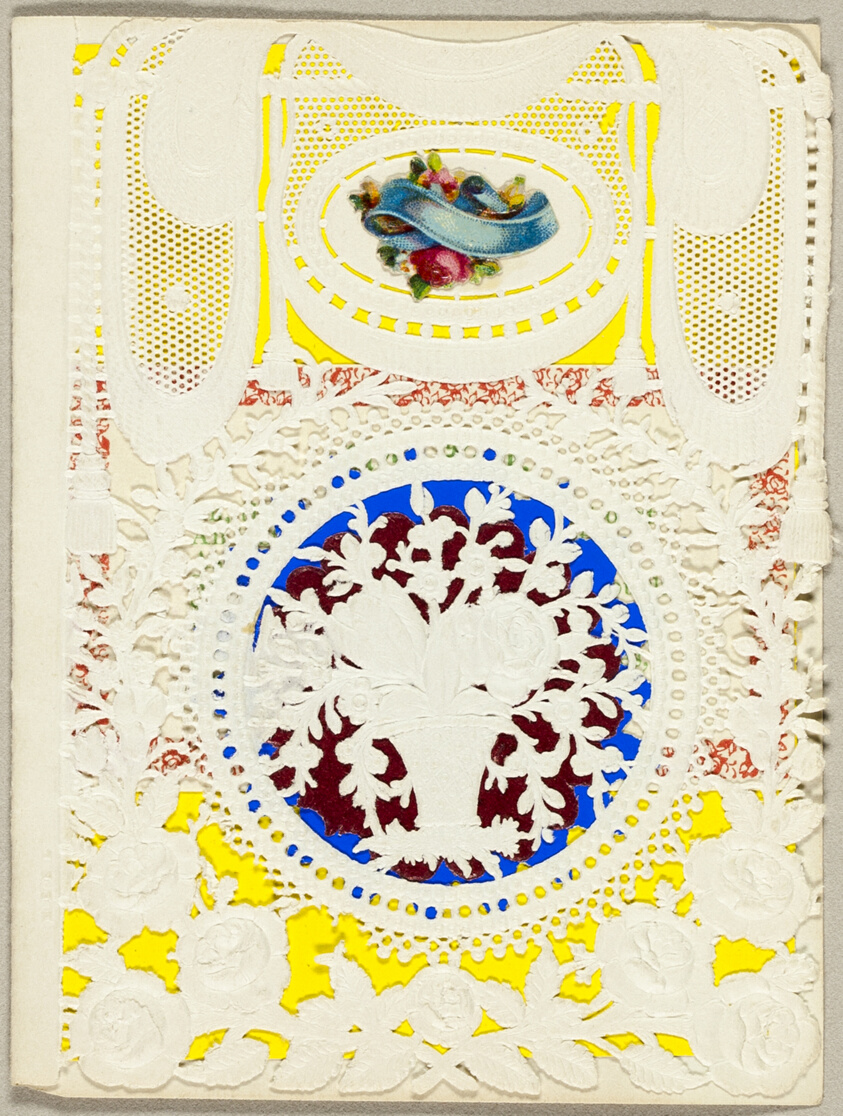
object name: Drawing and Watercolor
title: Untitled Valentine (Vase of Flowers)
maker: George Meek (English, 19th century)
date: 1850/59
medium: Collaged elements on cut and embossed (designed) ivory wove paper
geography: England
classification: collage; valentine; prints and drawing; paper